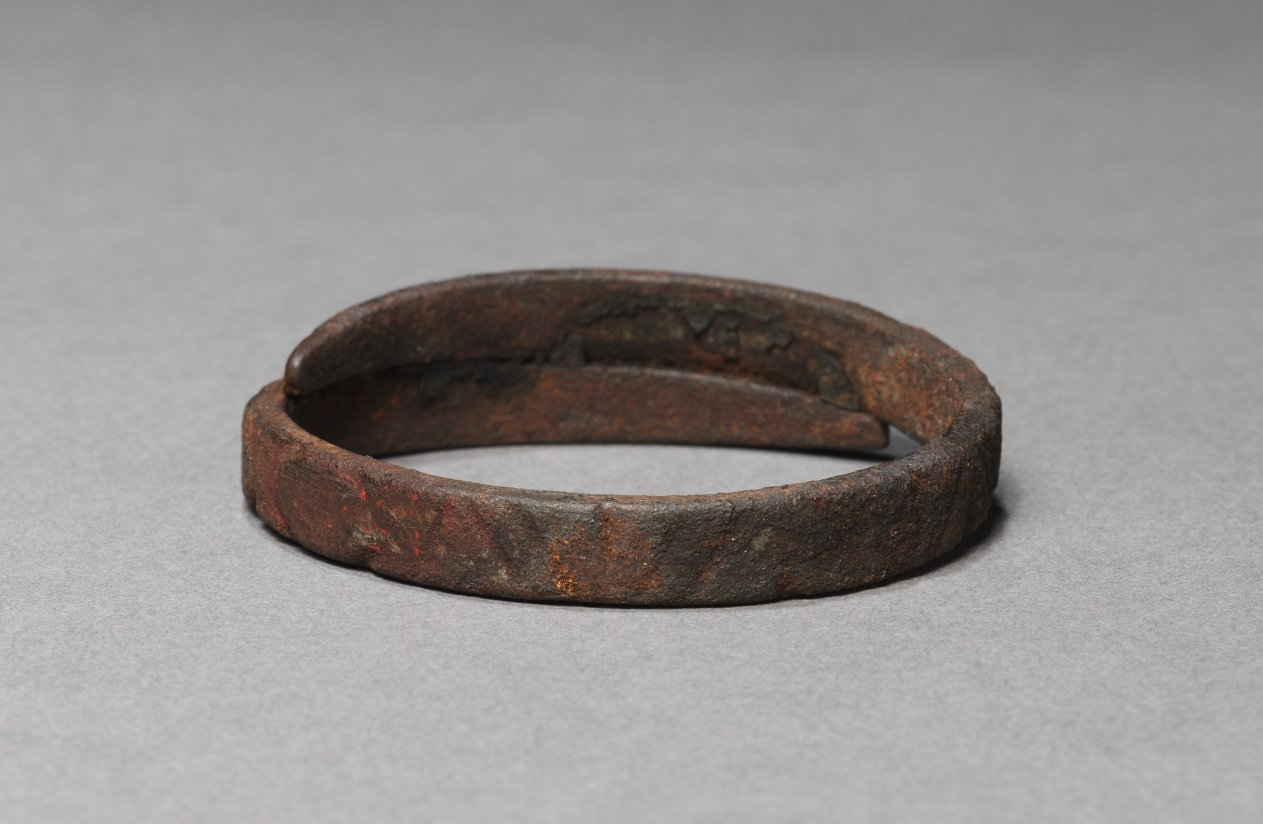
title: Bracelet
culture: Egypt, Greco-Roman period (332 BCE–395 CE), Roman empire (30 BCE–395 CE)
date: 200–400 CE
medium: iron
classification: Jewelry